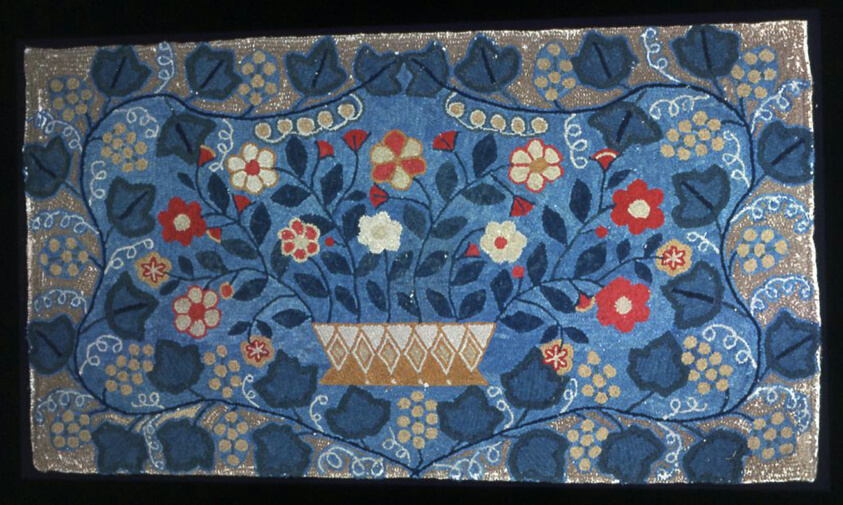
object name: Textile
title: Rug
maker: United States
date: 19th century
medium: Linen and cotton plain weave with wool yarns forming "hooked" pile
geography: United States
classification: textile; needlework - rug